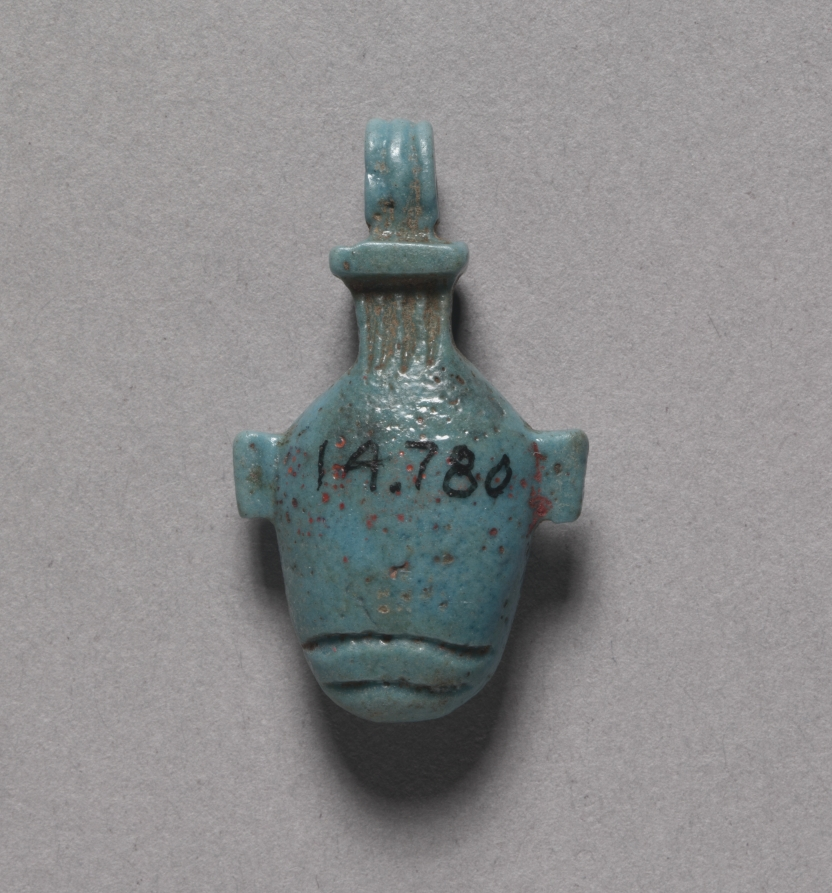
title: Heart Amulet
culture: Egypt, Third Intermediate (1069–715 BCE) or later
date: 1069–715 BCE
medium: deep turquoise-blue faience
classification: Amulets